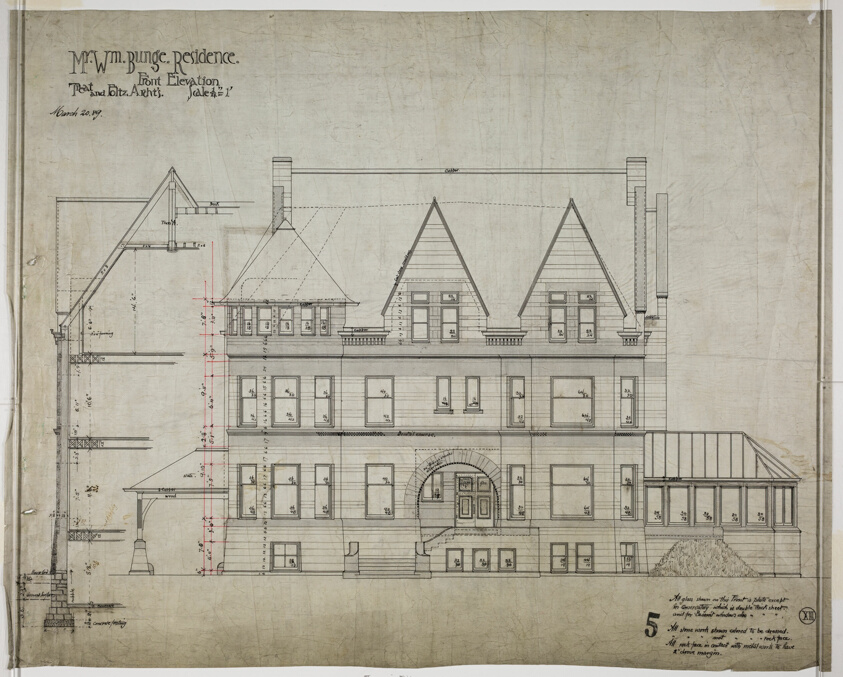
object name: Architectural Drawing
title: William Bunge House, Chicago, Illinois, Front Elevation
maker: Treat and Foltz; American, 1871-1897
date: 1889/90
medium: Black ink on linen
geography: Chicago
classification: working drawing; architectural drawing